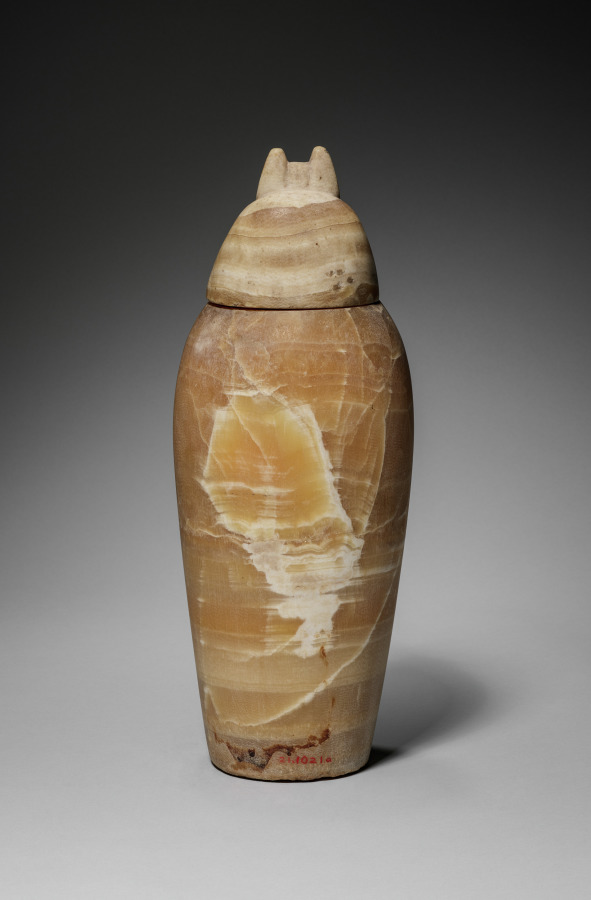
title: Canopic Jar with Jackal's Head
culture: Egypt, Late period (715–332 BCE), Dynasty 26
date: 664–525 BCE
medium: travertine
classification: Funerary Equipment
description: In the process of mummification, the liver, lungs, stomach, and intestines were removed, separately embalmed, and stored in specialized jars known as canopic jars (after a sailor in Greek mythology, who died at the town of Canopus in the Nile Delta and was worshipped there in the form of a human-headed jar). Each organ was identified with one of four funerary deities collectively known as the Sons of Horus: the liver with Imsety (man's head), the lungs with Hapy (baboon's head), the stomach with Duamutef (jackal's head), and the intestines with Qebehsenuef (falcon's head). It was their duty to protect the deceased and restore to him his body parts in the hereafter.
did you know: This jar is made of travertine stone-- subtle in color and with a captivating natural pattern-- with hieroglyphics carved on the front. Such jars were used to hold internal organs of the deceased and to preserve them for the afterlife.